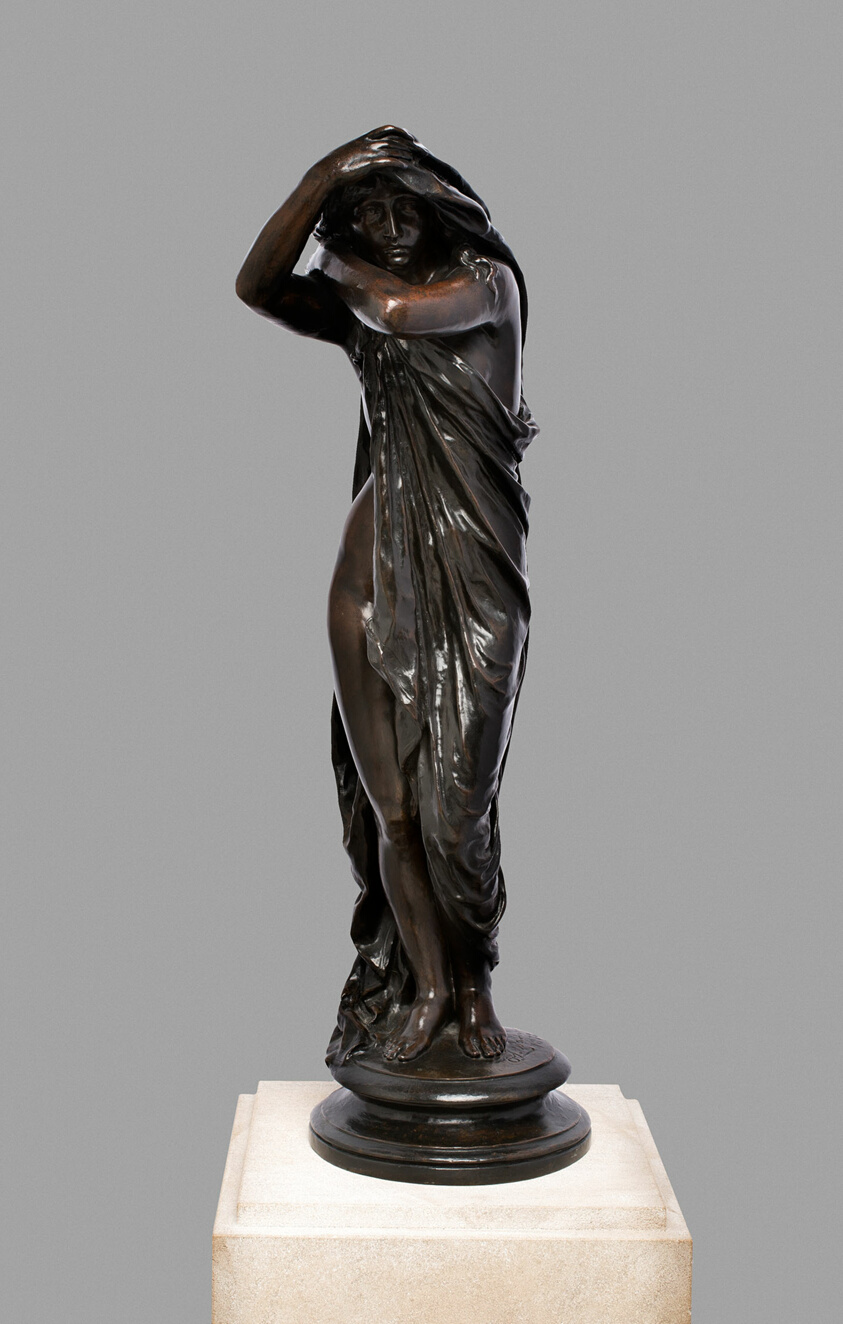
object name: Sculpture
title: Twilight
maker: Olin Levi Warner (American, 1844–1896); Probably cast by Jno. Williams, Inc. (American, 1875-1956); New York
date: Modeled and cast 1878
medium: Bronze, dark brown patina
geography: New York City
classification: sculpture; american arts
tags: people, portraits